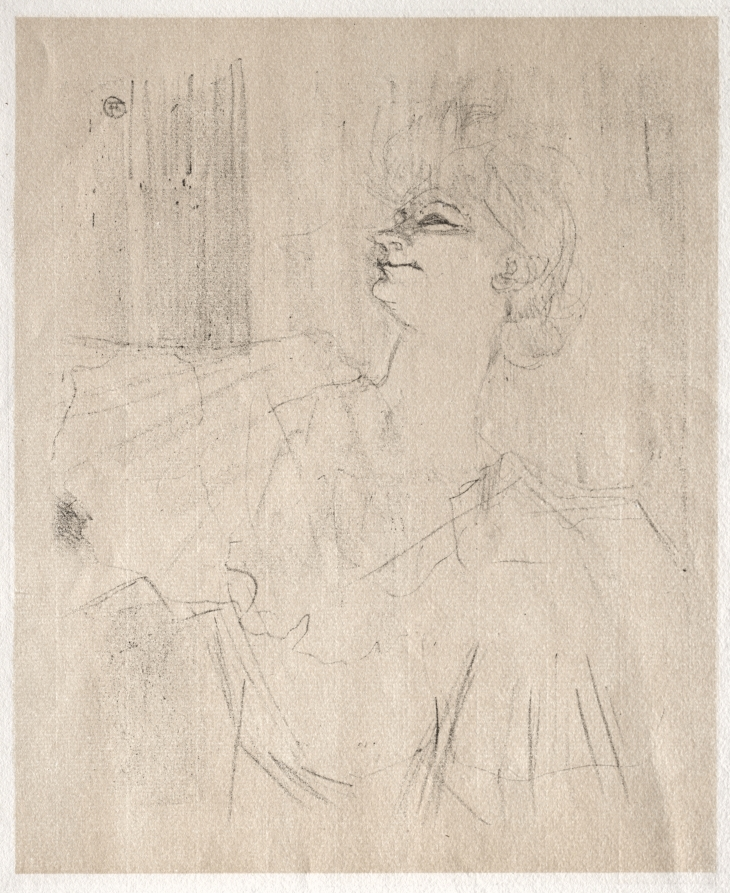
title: Yvette Guilbert: à Ménilmontant, de Bruant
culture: France, 19th century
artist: Henri de Toulouse-Lautrec (French, 1864–1901)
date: 1898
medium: lithograph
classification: Print